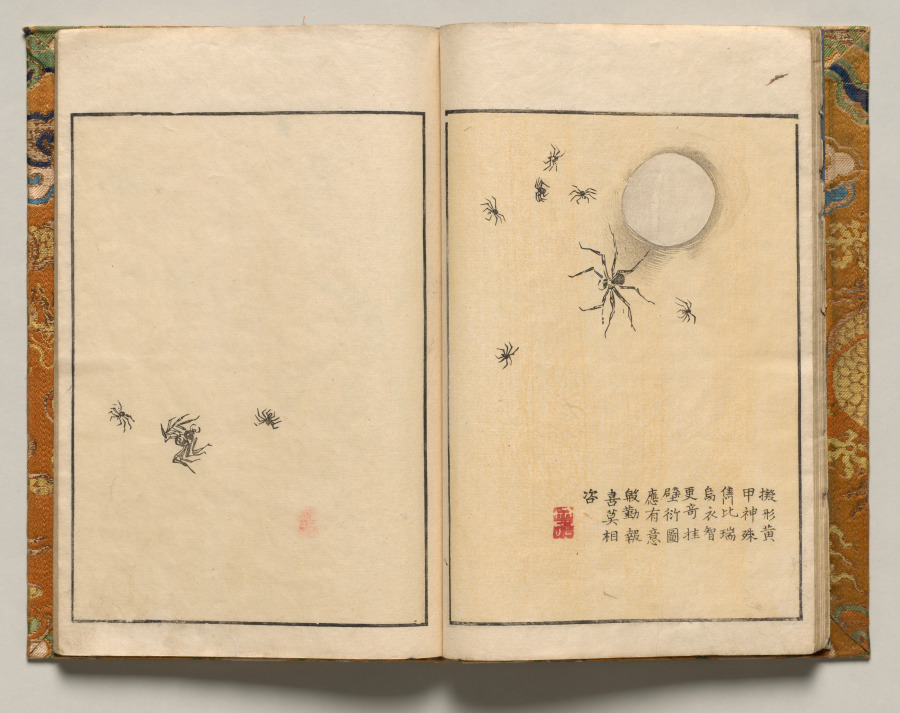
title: Spiders with Commentary, Design Eight from Shazanrō Picture Book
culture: Japan, Edo period (1615–1868)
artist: Tani Bunchō (Japanese, 1763–1841)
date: 1816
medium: woodblock-printed book; ink and color on paper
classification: Bound Volume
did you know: Shazanrō was one of Tani Bunchō's style names.